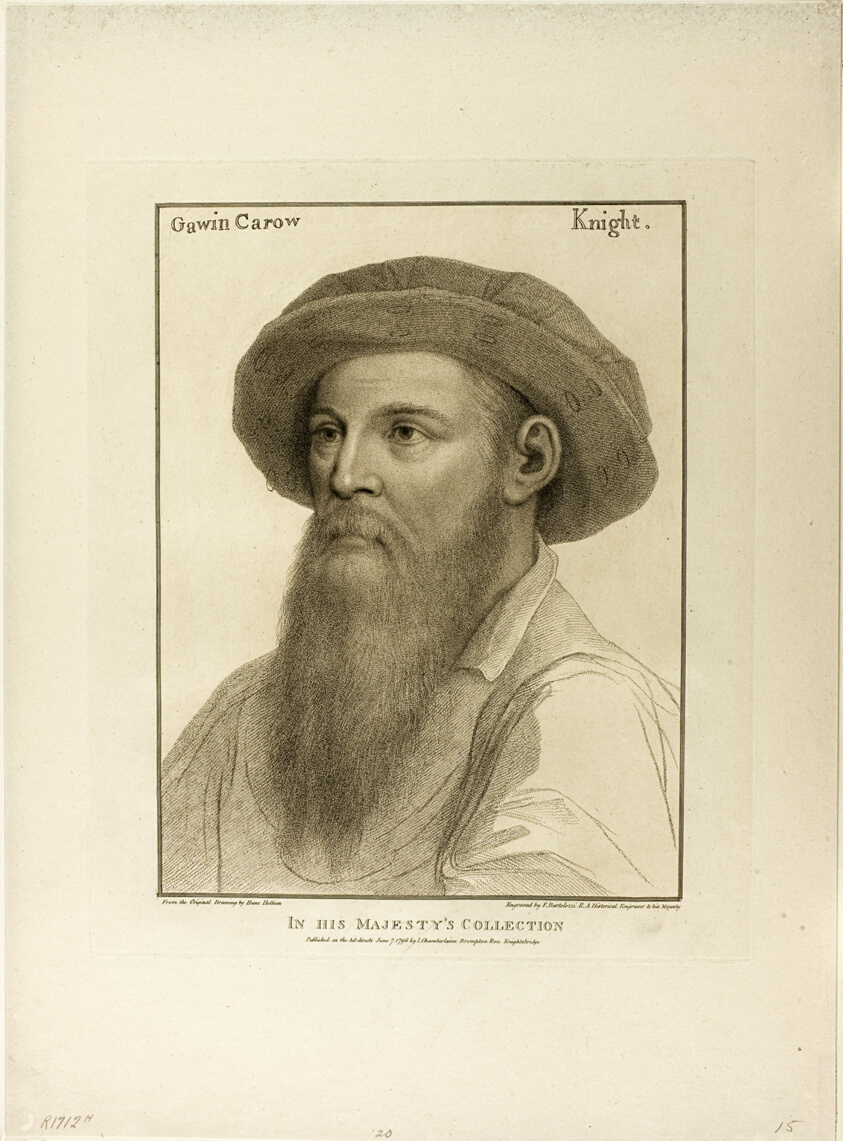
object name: Print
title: Sir Gawin Carew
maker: Francesco Bartolozzi (Italian, 1727-1815); after Hans Holbein the younger (German, 1497-1543)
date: June 7, 1796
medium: Stipple engraving on ivory wove paper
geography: Italy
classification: engraving; print; prints and drawing